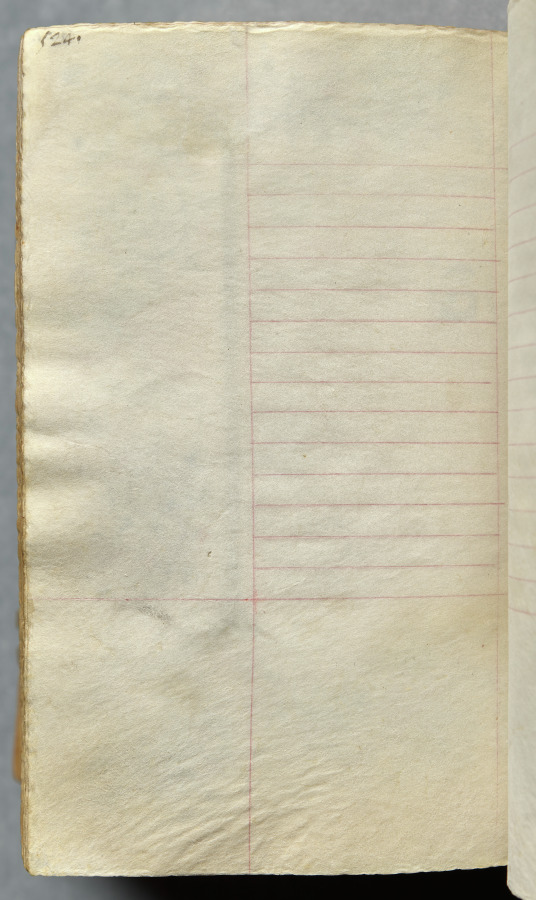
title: Hours of Charles the Noble, King of Navarre (1361-1425): fol. 256v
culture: France, Paris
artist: Master of the Brussels Initials and Associates (French)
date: c. 1405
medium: ink, tempera, and gold on vellum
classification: Bound Volume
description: This precious volume was obviously highly prized by its owner, the French-born King of Navarre, who had his coat of arms painted on no less than twenty folios. Rather than directly commissioning this manuscript from a specific workshop, it seems that Charles the Noble acquired his book of hours -- perhaps ready-made for the luxury market -- while on a trip to Paris in 1404-05. A collaborative effort, six painting styles are evidenced within the pages of this codex, those of two Italians, two Frenchmen, and two Netherlanders. The painter who was responsible for the planning and decoration of the book, and who produced seventeen of the large miniatures, was a Bolognese artist known as the Master of the Brussels Initials. His principal assistant, responsible for most of the borders, was a Florentine who signed his name "Zecho" da Firenze on folio 208 verso.